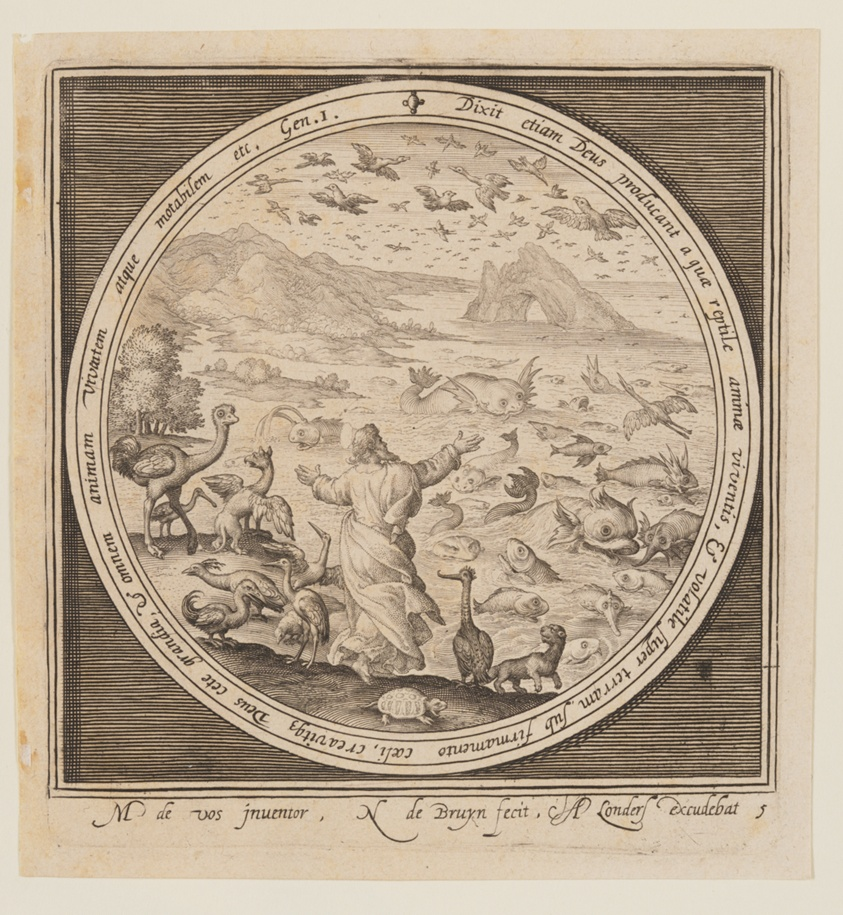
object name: Print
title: Fifth Day: The Creation of Birds and Fish, from The Creation to the Expulsion from Paradise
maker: Nicolaes de Bruyn (Flemish, 1571–1656); after Maarten de Vos (Flemish, 1532–1603)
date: c. 1610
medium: Engraving on ivory laid paper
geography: Flanders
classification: engraving; paper; print; prints and drawing